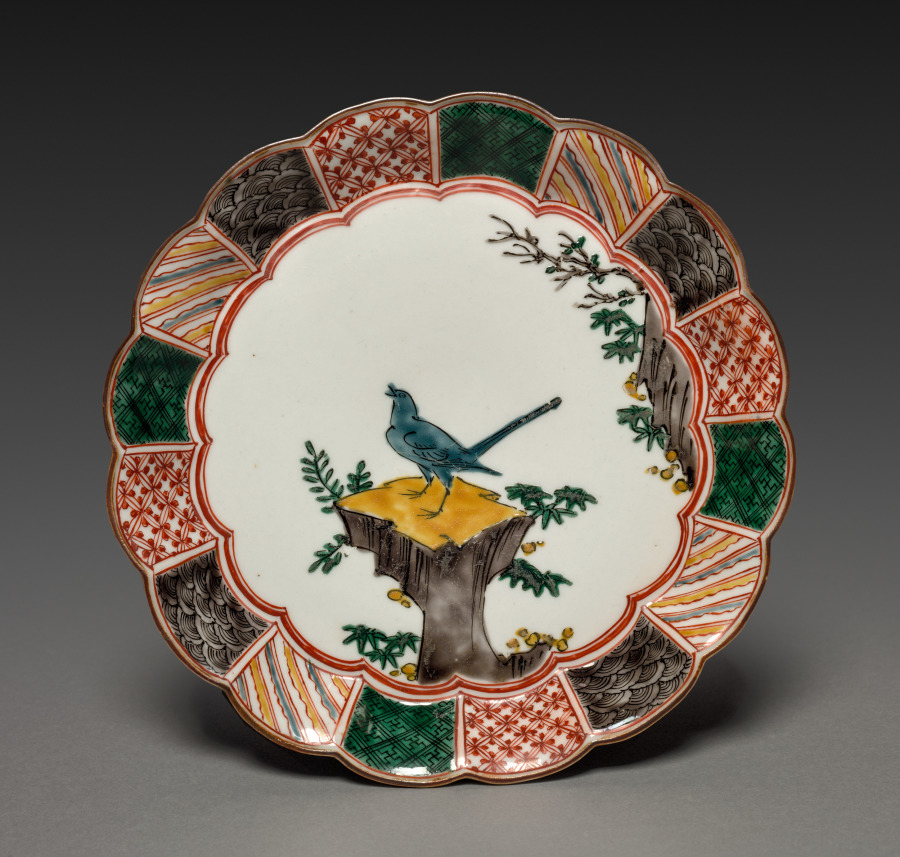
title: Dish with Singing Bird on a Rock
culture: Japan, Edo period (1615–1868)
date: 1700s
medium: porcelain with underglaze blue and overglaze color enamel (Hizen ware, Ko-Kutani style)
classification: Ceramic